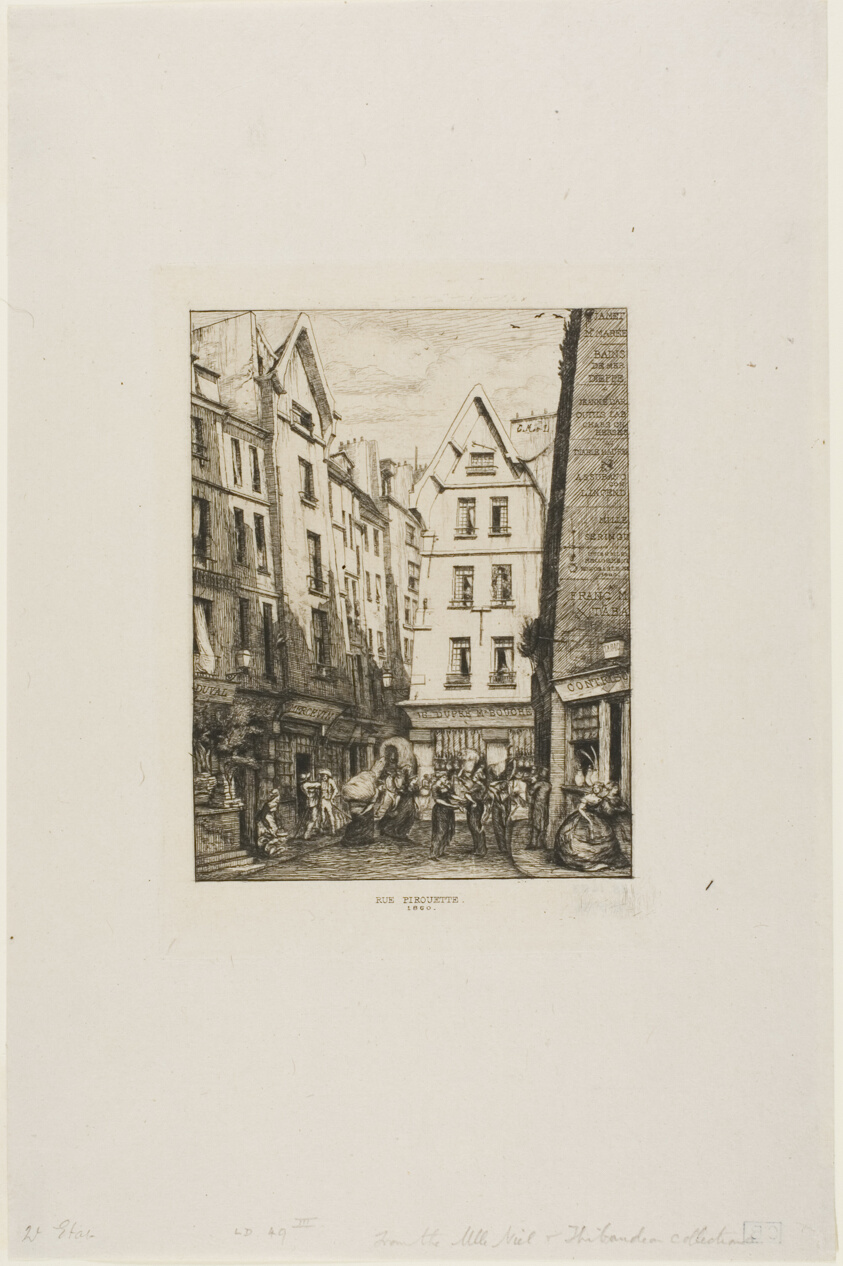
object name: Print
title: Rue Pirouette aux Halles, Paris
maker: Charles Meryon (French, 1821-1868); after Louis-Marie Laurence (French, 1811-1886)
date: 1860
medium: Etching and drypoint on ivory laid paper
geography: France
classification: etching; print; prints and drawing